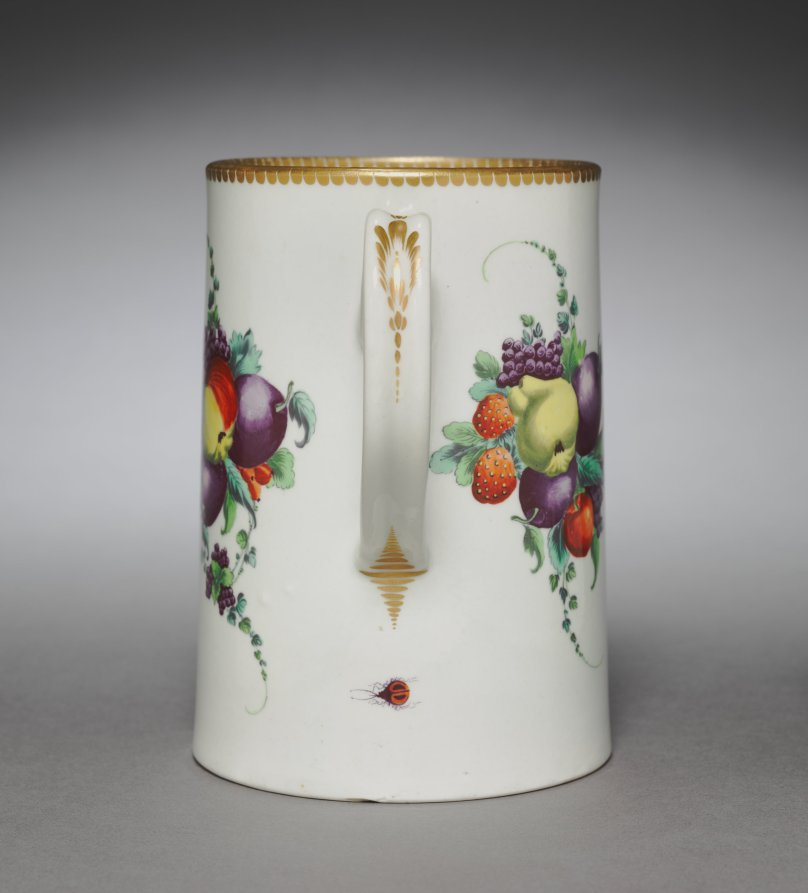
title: Cann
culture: England, 18th century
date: c. 1770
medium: ceramic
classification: Ceramic